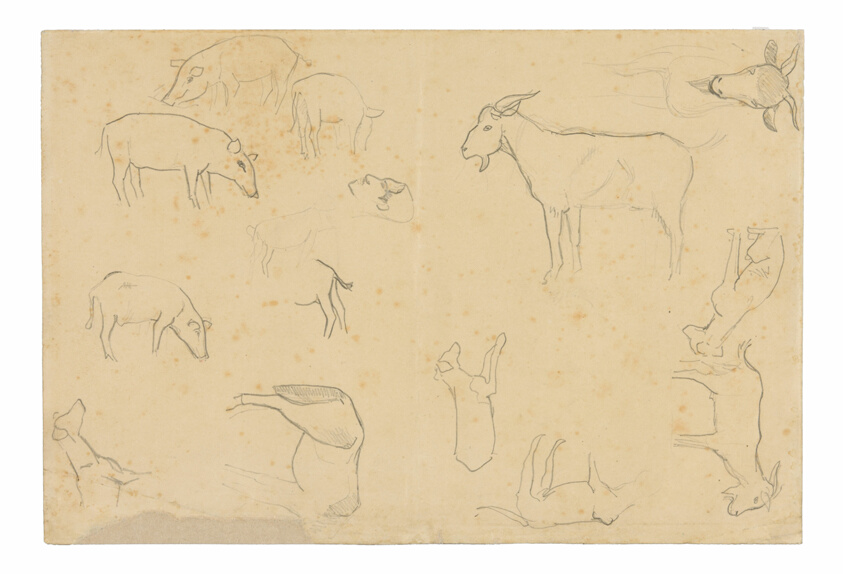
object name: Drawing and Watercolor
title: Sketches of Various Animals and Head (recto), Sketches of a Head, Figure in Profile, Anatomical Details, and Animals (verso)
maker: Paul Gauguin (French, 1848-1903)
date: 1891/93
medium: Graphite (recto); graphite, with pen and pale-yellow ink (originally purple) (verso); on cream wove paper, discolored to tan (removed from a sketchbook)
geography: France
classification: graphite; drawings (visual works); prints and drawing